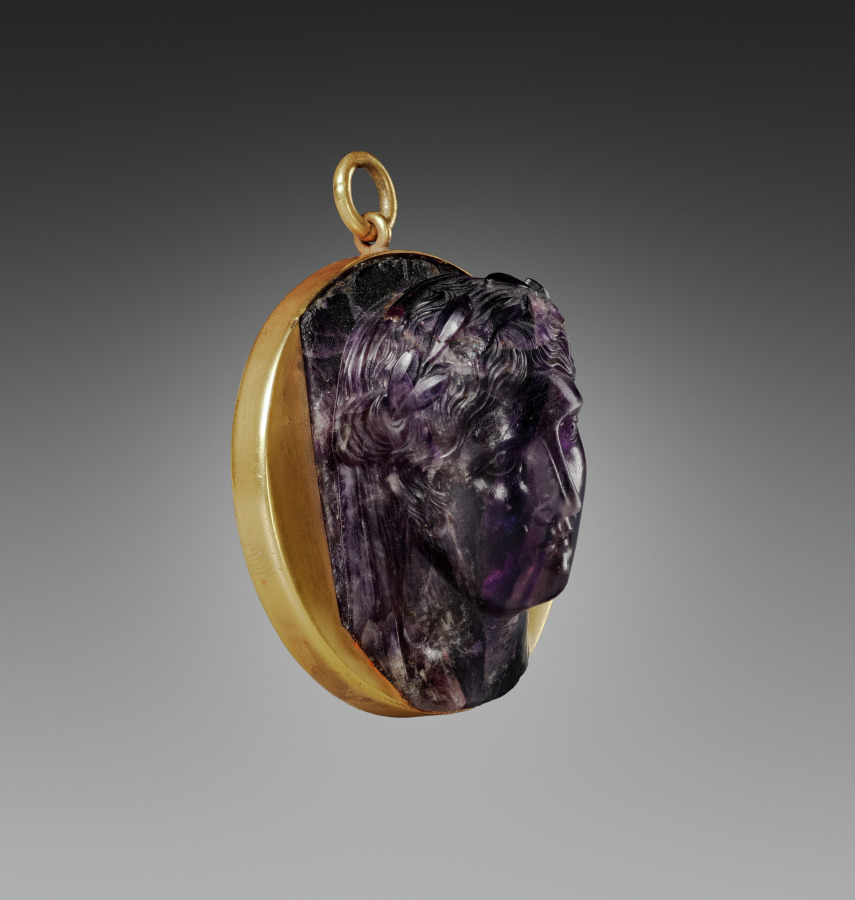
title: Cameo: Head of a Woman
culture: Italy, Roman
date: 1–100 CE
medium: amethyst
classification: Jewelry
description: This carved amethyst cameo depicts a woman wearing a laurel wreath and a palla, a cloak worn by Roman noblewomen. The palla is tucked behind the woman’s ears and is visible over her right shoulder. She may have been a member of the Julio-Claudian imperial family or a wealthy private individual. In her hairstyle, straight nose, and small but full mouth the woman closely resembles portrait cameos identified as Antonia Minor, niece of the emperor Augustus and mother of the emperor Claudius. Only elite Romans could use amethyst; true purple stones had to be imported to Rome at great expense.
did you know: The metal setting is modern; this gem was likely originally a roundel.